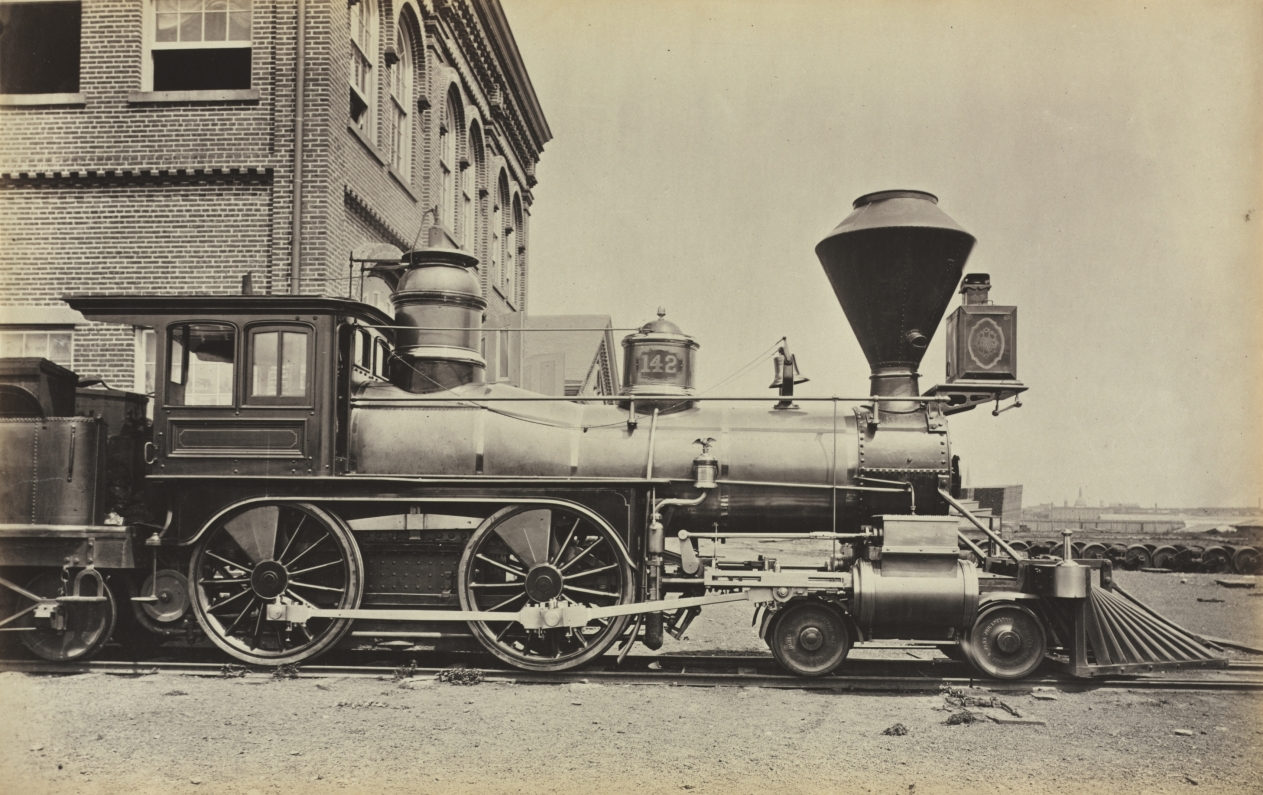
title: Untitled (Pennsylvania Railroad Engine)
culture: America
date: c. 1868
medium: albumen print from a wet collodion negative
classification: Photograph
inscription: written in pencil on verso: "K474e"